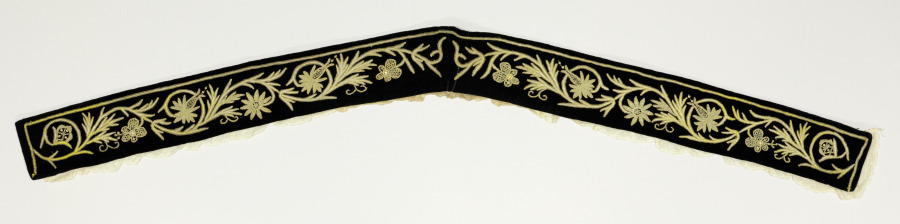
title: Woman's Costume (Collar)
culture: Italy, Sicily, 19th century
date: 1800s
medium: velvet (black) with metal thread embroidery and lace edging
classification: Garment